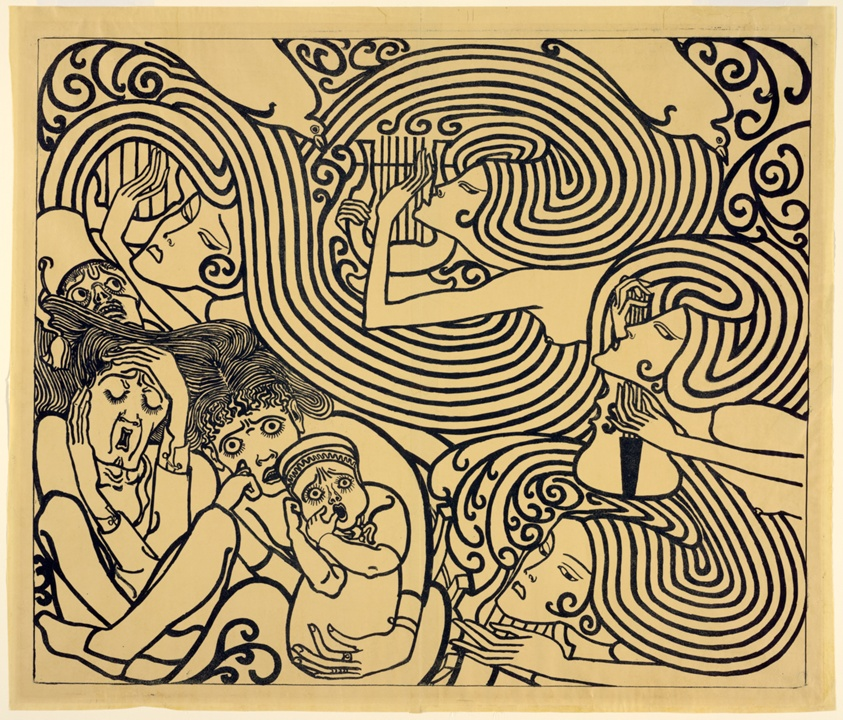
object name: Print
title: Image Design for a Poster, Wagenaar's Cantata 'The Shipwreck'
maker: Jan Toorop (Dutch, 1858-1928)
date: 1899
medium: Zincograph in blue-black on yellow wove paper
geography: Netherlands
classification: lithograph; prints and drawing; print